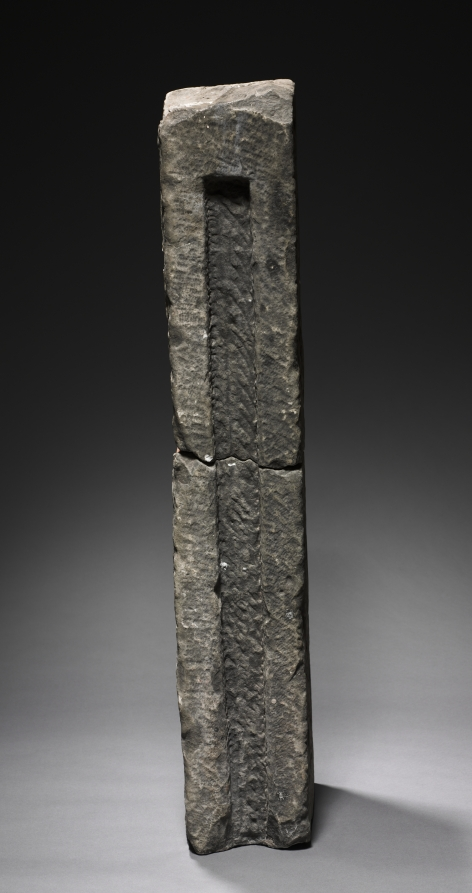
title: Transenna Post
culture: Lombardic, Italy, Rome, Migration period, 8th-9th Century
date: 700s-800s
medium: marble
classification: Sculpture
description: In Christian architecture a transenna is an openwork screen of stone or metal enclosing a shrine. These transenna elements were found in Rome; the posts were said to have been excavated on the Coelian Hill and may have originally formed part of the transenna of the Church of San Saba. The Lombards were an ancient Germanic-speaking tribe that settled in Italy after 568. Their artistic tradition was originally centered on small objects of personal adornment like buckles and brooches. After occupying Italy, the Lombards found themselves in contact with large-scale sculpture of classical and early Christian origin that, by the end of the 700s, they had learned to adopt and imitate, as seen here.